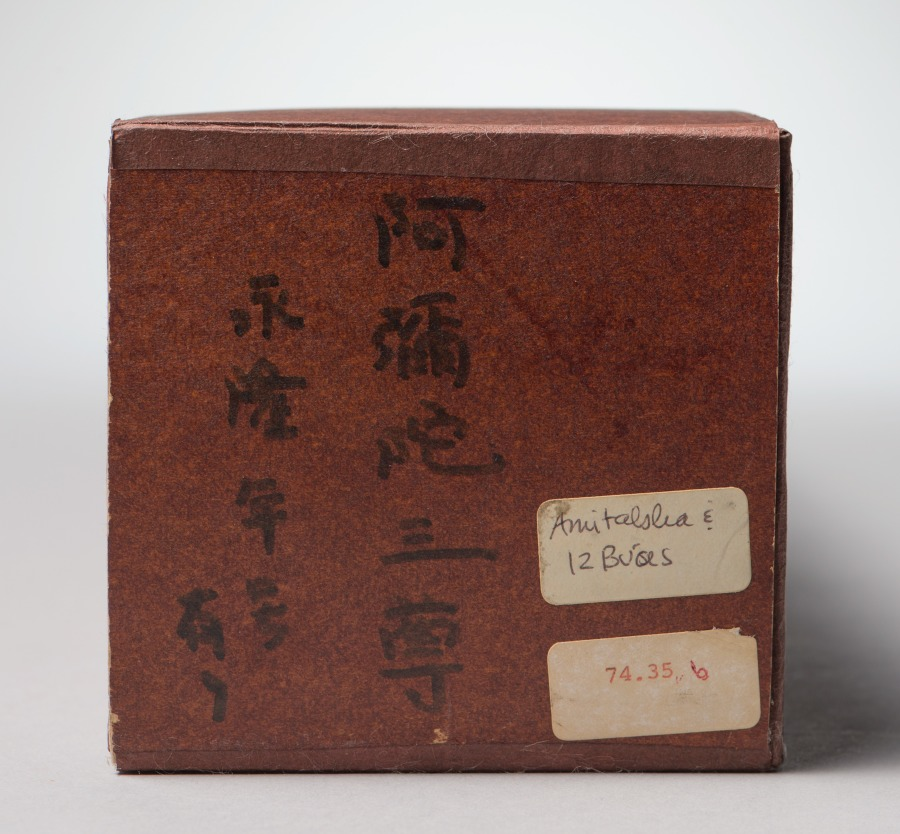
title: Buddha Amitābha with Two Attending Bodhisattvas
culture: China, Southern Song dynasty (1127-1279)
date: 1200s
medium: Hanging scroll; ink and color on silk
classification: Painting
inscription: 南無阿彌陀佛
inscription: 沙門善導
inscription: 觀世音菩薩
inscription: 大勢至菩薩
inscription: 永隆元年十月十五日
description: The supreme deities that rule over the Western Paradise—Amitābha (阿彌陀 in Chinese), Avalokiteśvara (Guanyin 觀音), and Mahāsthāmaprāpta (Dashizhi 大勢至)—are here enclosed within a circle of light. To secure entry into that paradise for Buddhist followers of the Pure Land sect, one must recite the phrase namo amituofo (南無阿彌陀佛, Homage to the Buddha Amitābha). Here the phrase is repeated 10 times in calligraphy above the figures, reinforcing the need for continual recitation.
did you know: Each line of calligraphy, which invokes the Buddha's name, emerges from a lotus blossom.